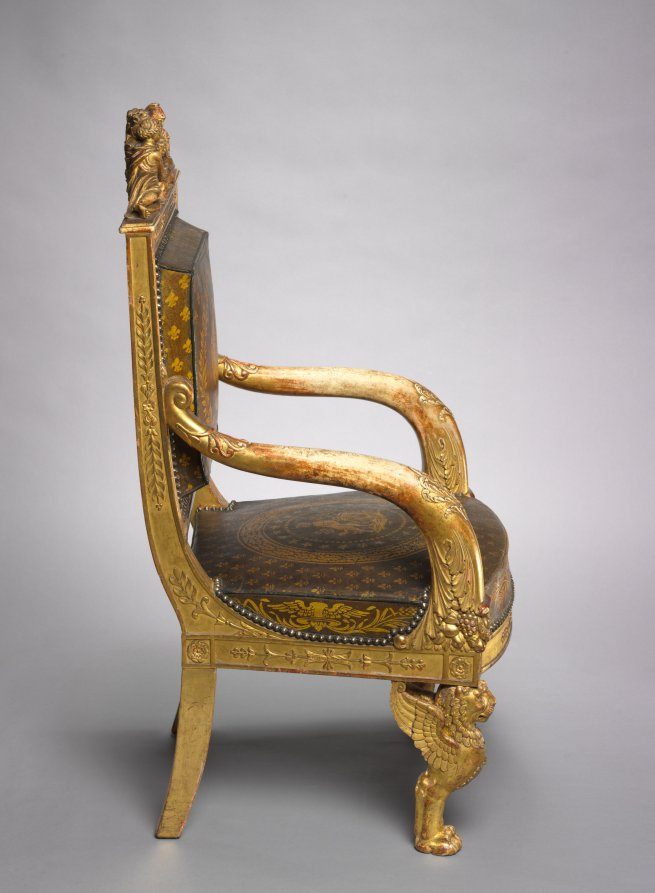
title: Child's Throne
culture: France, Paris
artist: Pierre-Marie Balny le Jeune (French, 1832)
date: 1822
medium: carved and gilded wood, leather upholstery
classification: Furniture and woodwork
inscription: inscribed with stencils inside back rail: BLONDEL TAPISSIER/RUE ST. ANTOINE N 72 1822 inscribed in ink lower edge back rail: 12 JANVIER 18[22?]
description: This chair was made for the young, presumed successor to the French throne who ruled briefly as Henri V in 1830, the last of the direct Bourbon line. He is depicted at the center of the top rail protected by female figures representing France and Minerva, the Roman goddess of wisdom. Fleurs-de-lis and the Gallic rooster, symbols of French royalty and the French people, decorate the upholstery.